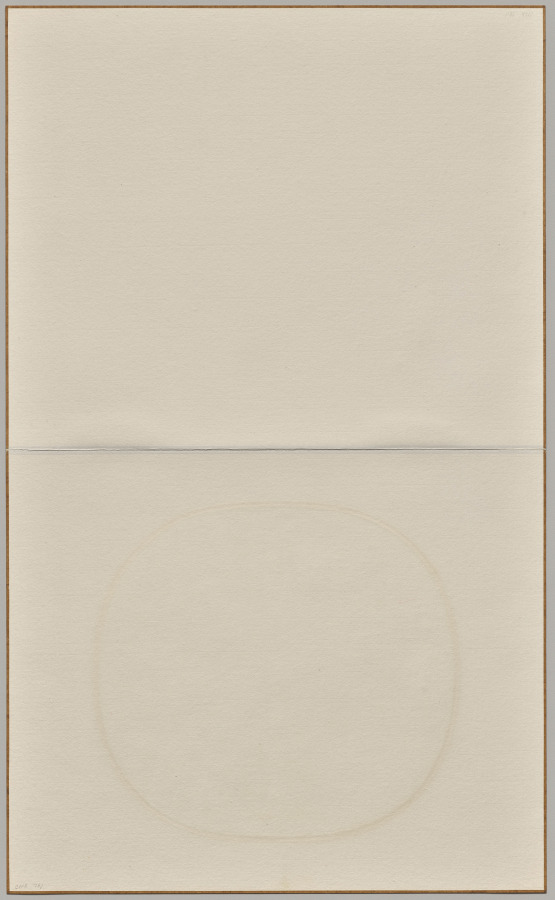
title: Swinging Gibbon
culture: China, Southern Song dynasty (1127-1279)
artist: attributed to Xia Gui (Chinese, active c. 1209–c. 1243)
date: late 1100s–early 1200s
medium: Album leaf; ink and color on silk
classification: Painting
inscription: Artist's signature: Hsia ? .